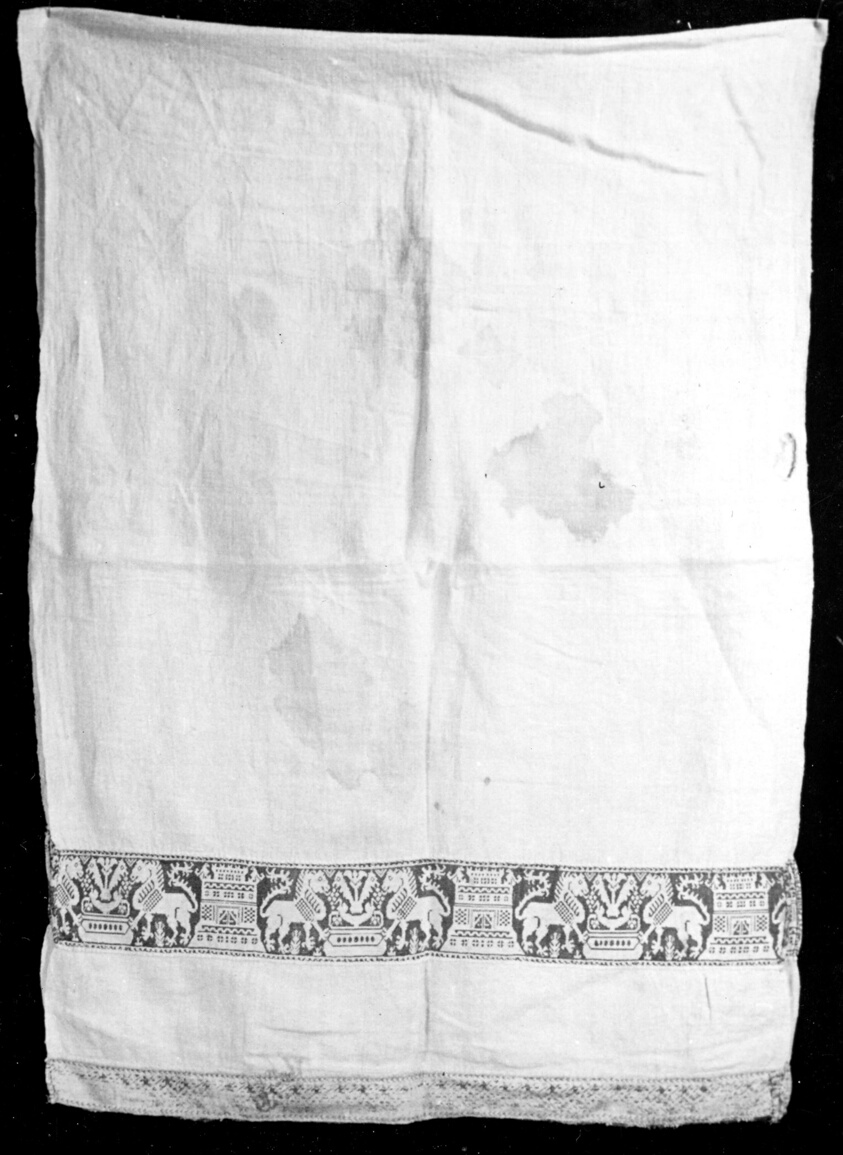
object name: Textile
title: Towel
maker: Italy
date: 17th century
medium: White linen with borders of red silk and white linen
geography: Italy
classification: textile; weaving